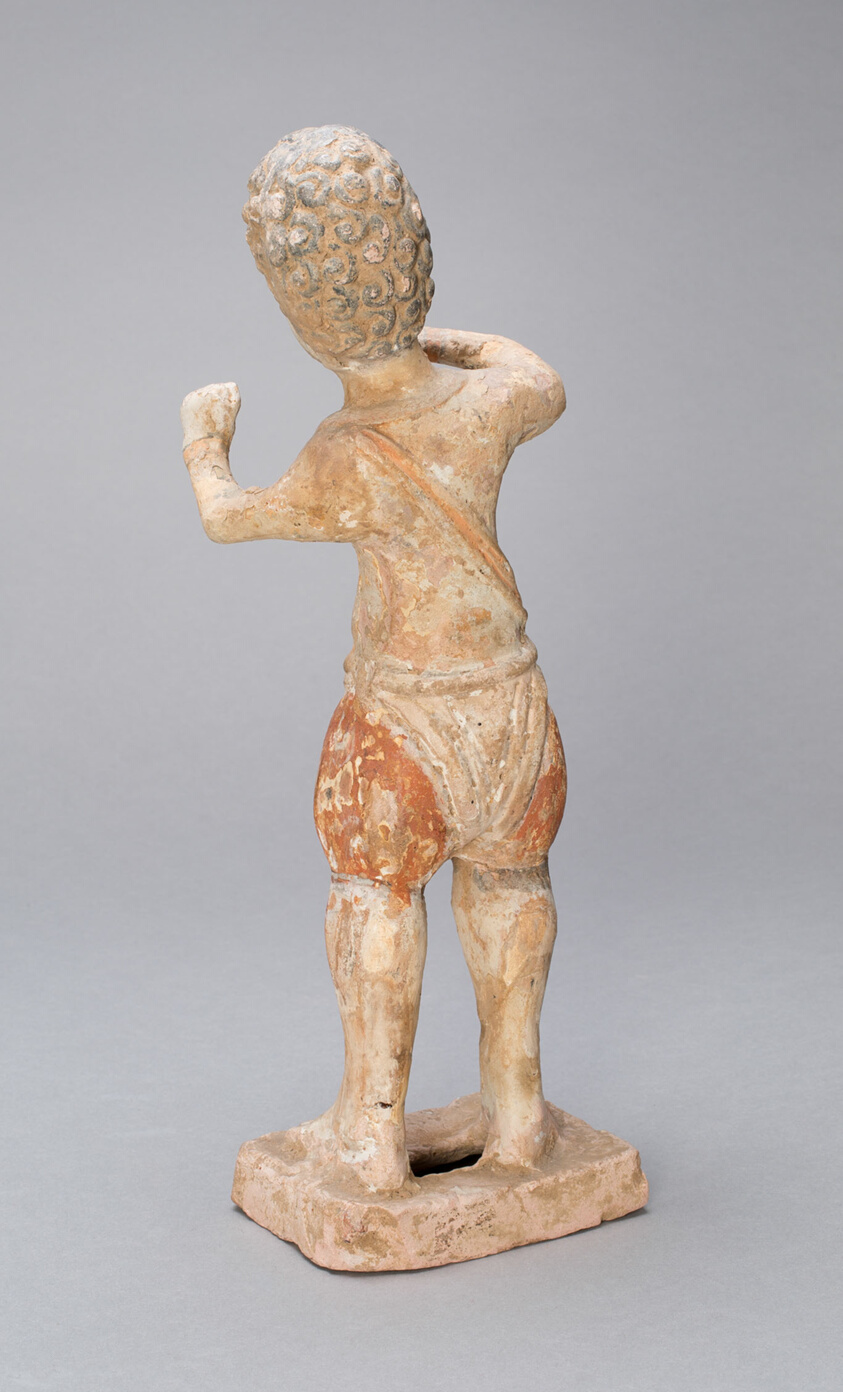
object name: Sculpture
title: Curly-Haired Youth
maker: China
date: Style of Tang dynasty (618–906)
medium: Earthenware with traces of pigment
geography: China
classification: ceramics; asian art